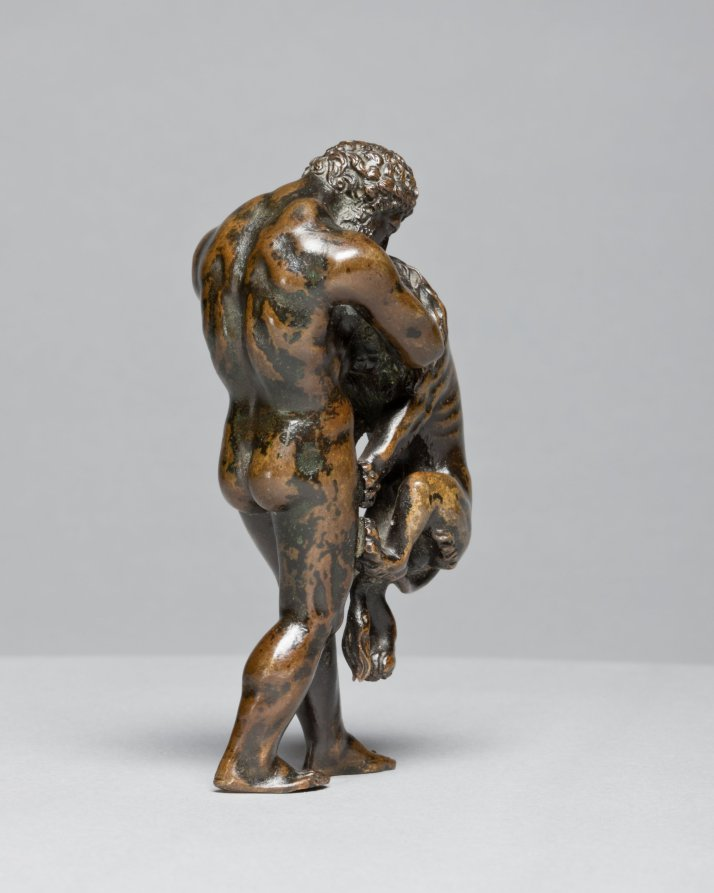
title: Hercules and the Nemean Lion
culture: Italy or France, 16th century or later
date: 1500s or later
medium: bronze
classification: Sculpture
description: The original owner of this work would have understood that this scene referred to the entire story of Hercules, the demi-god who had to accomplish twelve labors. The lion is named after the city of Nemea, near Corinth, a monstrous beast sent by the goddess Hera to wreak havoc on the area. After killing the lion, Hercules wore his pelt, commonly seen in other representations of the hero.